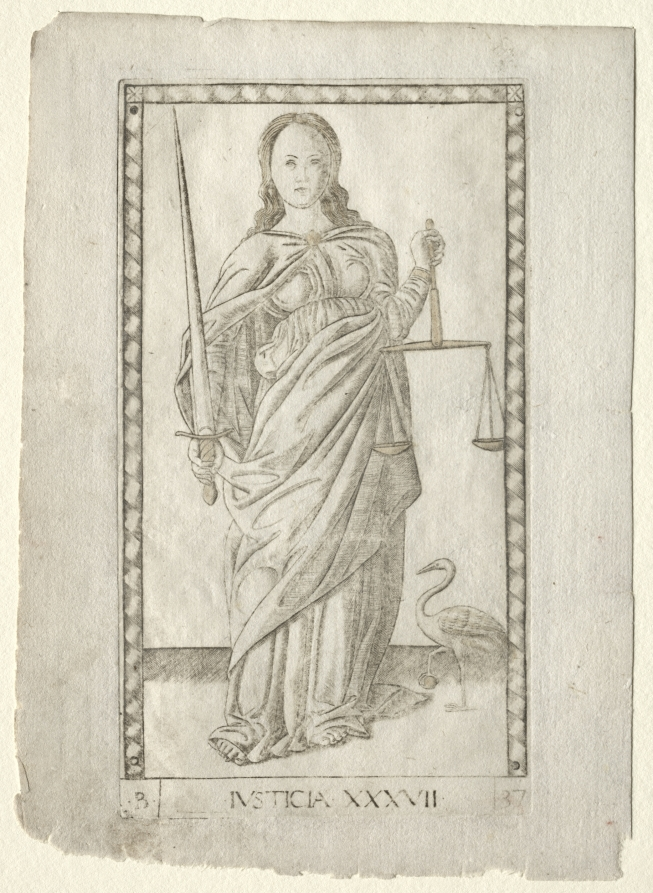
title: Justice (from the Tarocchi, series B: Cosmic Principles & Virtues, #37)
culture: Italy, Ferrara, 15th century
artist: Master of the E-Series Tarocchi (Italian, active 1460s)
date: before 1467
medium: engraving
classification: Print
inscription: Lettered below the image of Iusticia (Justice): ·B· / ·IVUSTICIA·XXXVII· / ·37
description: This engraving is part of the group marked with the letter “B,” and named Cosmic Principles and the Virtues, which comprises the three Universal principles (Light, Time, and Space) alongside the three theological virtues (Faith, Hope, and Charity) and the four cardinal ones (Prudence, Temperance, Fortitude, and Justice). The latter were regarded as the basic Christian principles required for a virtuous life. Here, Iusticia (Justice) is personified as a full-length female figure holding up a sword and a scale in her right and left hand, respectively. These two attributes allude to the determination of right and wrong, and to her power to punish. Justice is always vigilant as her symbol, the crane. Medieval texts narrate that crane sentinels are given stones to hold in their claws in order to verify their careful night watch for danger. If they fall asleep, they drop the stone, and ultimately reveal their neglect of duty. In this engraving, a crane takes place next to Justice, and keeps a firm clasp on a rock.